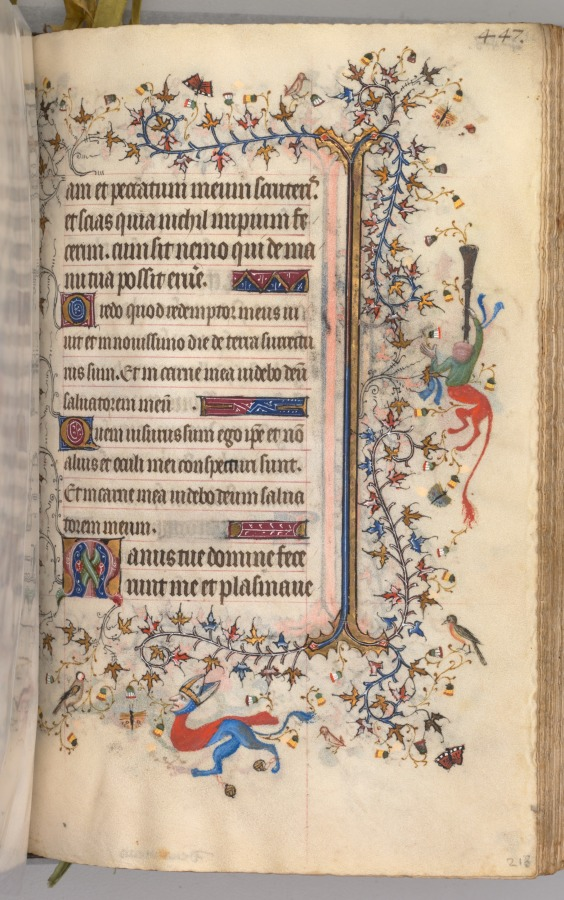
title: Hours of Charles the Noble, King of Navarre (1361-1425): fol. 218r, Text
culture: France, Paris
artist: Master of the Brussels Initials and Associates (French)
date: c. 1405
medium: ink, tempera, and gold on vellum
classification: Bound Volume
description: This precious volume was obviously highly prized by its owner, the French-born King of Navarre, who had his coat of arms painted on no less than twenty folios. Rather than directly commissioning this manuscript from a specific workshop, it seems that Charles the Noble acquired his book of hours -- perhaps ready-made for the luxury market -- while on a trip to Paris in 1404-05. A collaborative effort, six painting styles are evidenced within the pages of this codex, those of two Italians, two Frenchmen, and two Netherlanders. The painter who was responsible for the planning and decoration of the book, and who produced seventeen of the large miniatures, was a Bolognese artist known as the Master of the Brussels Initials. His principal assistant, responsible for most of the borders, was a Florentine who signed his name "Zecho" da Firenze on folio 208 verso.